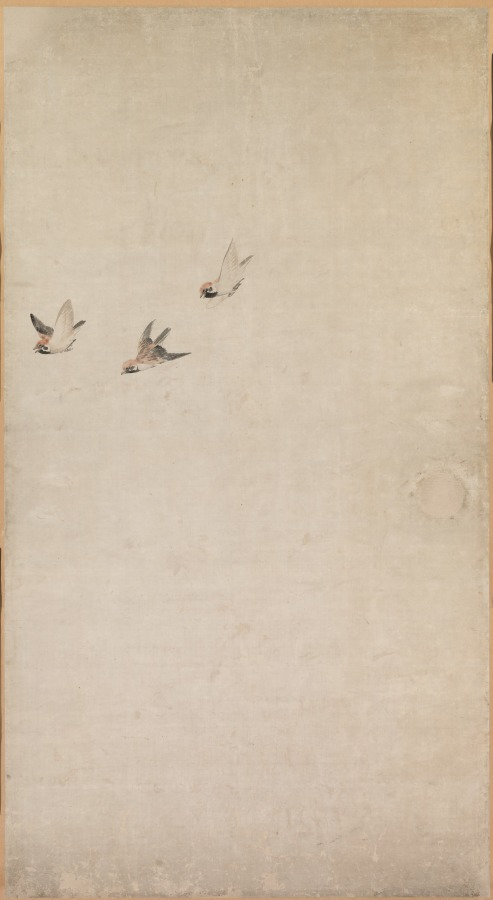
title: Puppies, Sparrows, and Chrysanthemums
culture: Japan, Edo period (1615–1868)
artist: Nagasawa Rosetsu (Japanese, 1754–1799)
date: c. 1792–94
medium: Fusuma panel remounted as a hanging scroll; ink and slight color on paper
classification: Painting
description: These paintings were originally mounted as sliding doors (fusuma) used inside a building. The circular areas on the paintings’ paper surfaces are traces of the former positions of the door pulls (hikite). A flock of sparrows gathers on a trellis supporting flowering chrysanthemum. Below is a litter of puppies, some cavorting, others napping. The tender story created by the curious puppy peering up and tilting its head to listen to the bird’s insistent call in the leftmost part of the composition is characteristic of Nagasawa Rosetsu’s paintings, which often use animals to illustrate the human condition.